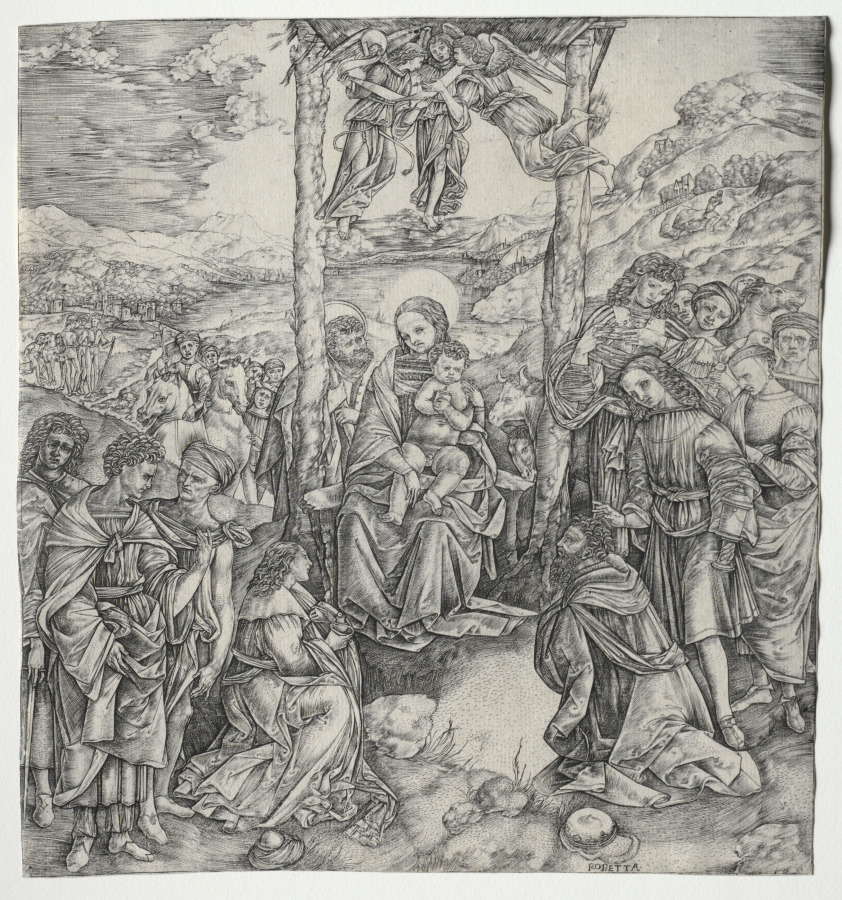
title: Adoration of the Magi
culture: Italy, late 15th-early 16th century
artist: Cristofano Robetta (Italian, 1462–1534)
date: c. 1510–15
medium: engraving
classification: Print